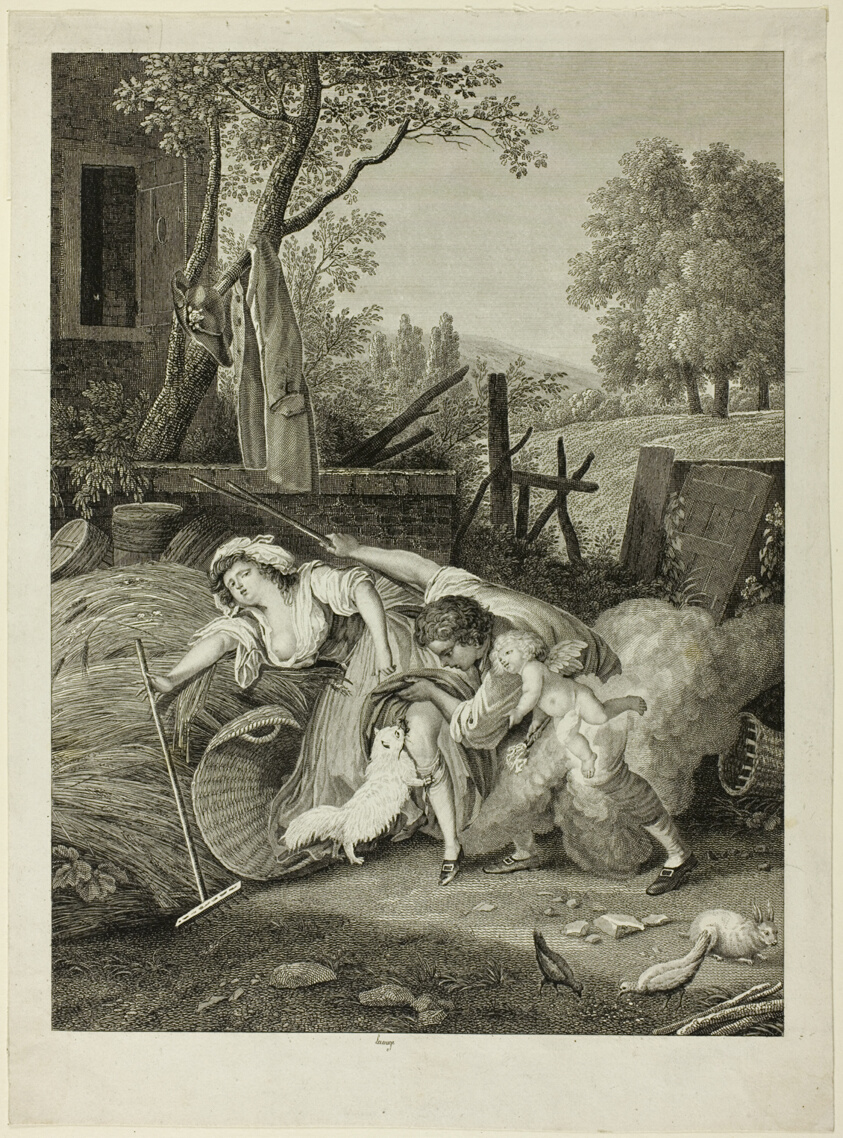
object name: Print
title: Farmyard Scene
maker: Possibly Jean Nicolas Lerouge; French 1776-1846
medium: Etching on ivory laid paper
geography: France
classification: etching; print; prints and drawing